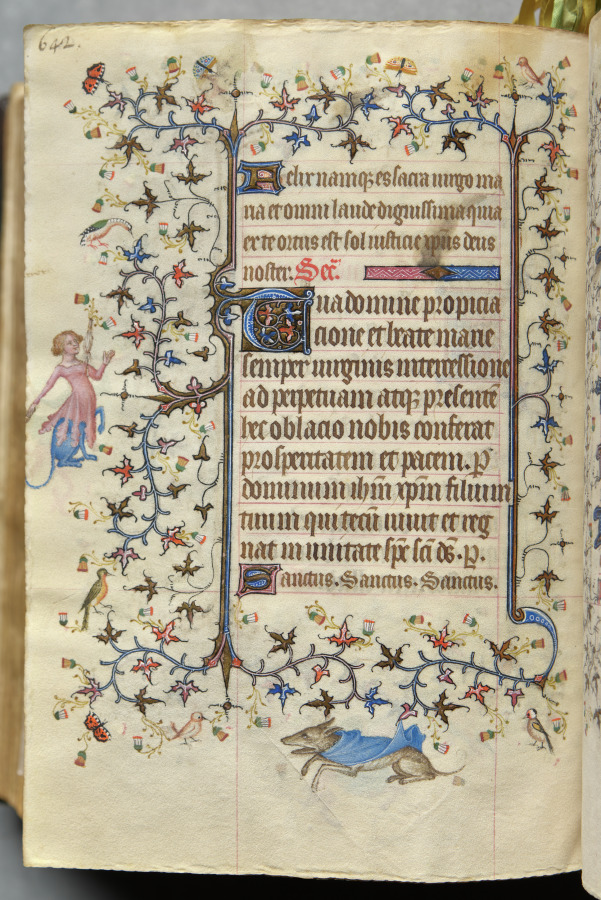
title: Hours of Charles the Noble, King of Navarre (1361-1425), fol. 315vr, Text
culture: France, Paris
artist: Master of the Brussels Initials and Associates (French)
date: c. 1405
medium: ink, tempera, and gold on vellum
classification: Bound Volume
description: This precious volume was obviously highly prized by its owner, the French-born King of Navarre, who had his coat of arms painted on no less than twenty folios. Rather than directly commissioning this manuscript from a specific workshop, it seems that Charles the Noble acquired his book of hours -- perhaps ready-made for the luxury market -- while on a trip to Paris in 1404-05. A collaborative effort, six painting styles are evidenced within the pages of this codex, those of two Italians, two Frenchmen, and two Netherlanders. The painter who was responsible for the planning and decoration of the book, and who produced seventeen of the large miniatures, was a Bolognese artist known as the Master of the Brussels Initials. His principal assistant, responsible for most of the borders, was a Florentine who signed his name "Zecho" da Firenze on folio 208 verso.